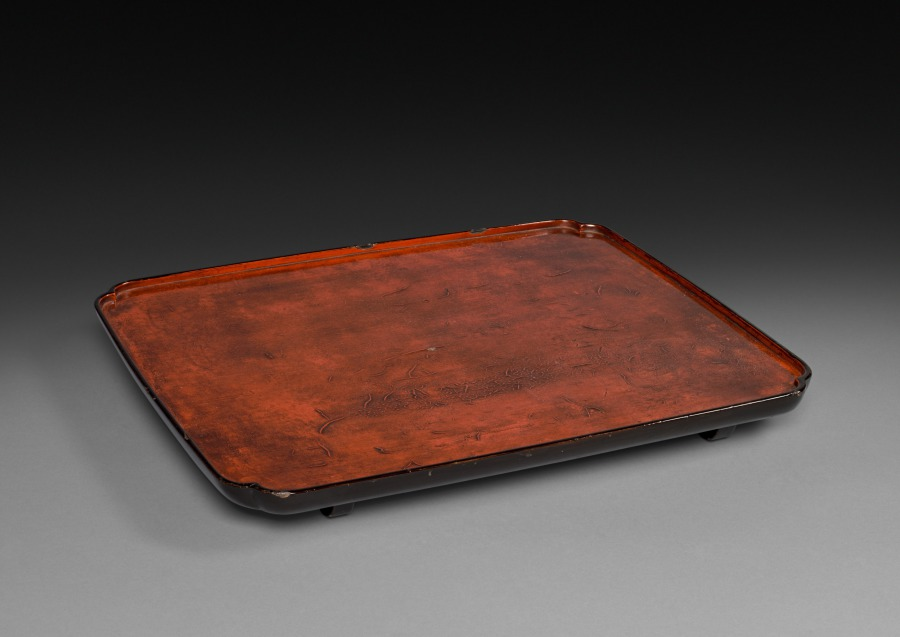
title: Serving Tray: Negoro Ware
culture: Japan, Kamakura period (1185–1333)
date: early 1300s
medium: lacquered wood with inlaid mother-of-pearl designs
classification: Lacquer